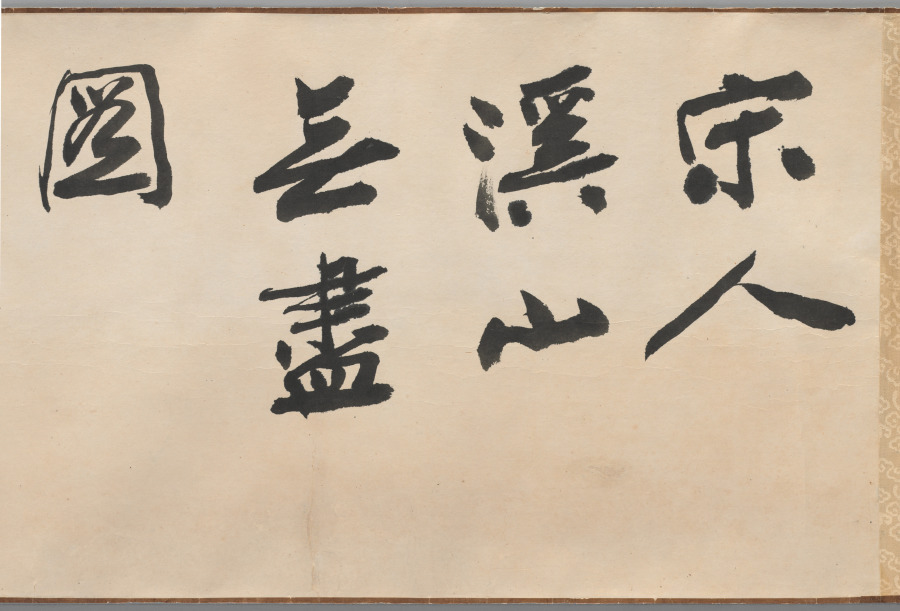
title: Streams and Mountains without End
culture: China, late Northern Song dynasty (960-1127) - Jin dynasty (1115-1234)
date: 1100–1150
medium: handscroll; ink and slight color on silk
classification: Painting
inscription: 9 colophons and 48 seals: 1 colophon, dated 1205, of Wang Wenwei 王文蔚 (dates unknown); 1 colophon, dated 1205, of Li Hui 李惠 (dates unknown); 1 colophon of Weiluo Tian Xie 蔚羅田獬 (dates unknown); 1 colophon, dated 1214, of He Yan 何言 (dates unknown); 1 colophon, dated 1326, of Cao Yuanyong 曹元用 (d. 1329) 1 colophon, dated 1332, of Kangli Zishan 康里子山 (Naonao; 1295-1345); 1 colophon, dated 1336, of Liu Zai 劉載. (dates unknown); 1 colophon, dated 1380, and 4 seals of Yang Mao 楊懋 (1300-after 1380); 4 seals of the Hou family (ca. 1340); 1 colophon of Wang Duo 王鐸 (1592-1652); 4 seals of Zhang Bingqian 張秉乾 (juren of 1729); 8 seals of Liang Qingbiao 梁清標 (1620-1691); 2 seals of the Qianlong emperor (r. 1736-95); 4 seals of the Jiaqing emperor (r. 1796-1820); 3 seals of the Xuantong emperor (r. 1909-11); 2 seals of Ye Gongchuo 葉恭綽 (1881-1968); 17 seals of Zhang Yuan 張爰 (Zhang Daqian 張大千, 1899-1983).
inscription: Colophon 1. Wang Wenwei 王文蔚. Dated third month and third day, 1205, under the reign of Zhangzong of the Jin dynasty. 造物元無心，山川秀氣聚。畫手亦無盡，各出新意度。 誰將妙林泉，淡墨寫縑素。重巒疊嶂間，三兩人家住。 茅舍隔素籬，小橋通細路。溪上數葉舟，雅有物外趣。 嵓崦藏招提，依稀認窗戶。山色四時宜，雲煙自朝暮。 不知塵世中，此景在何處。收拾買山錢，投老好歸去。 泰和乙丑三月三日平原王文蔚謹再拜，書于河東縣署之野趣堂。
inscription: Colophon 2. Li Hui 李惠. The colophon was written three days before the Qingming Festival in 1205. 畫師慣在山中居，含毫吮墨聊自娛。 閑將一段冰霜絹，寫出千里江山圖。 前山後山互出沒，山腰林樾相縈紆。 危橋澗溜瀉鳴玉，山根一匯為平湖。 波平短艇快漁釣，雲深細徑來樵蘇。 僊宮梵宇占幽勝，雕欄複閣森蓬壺。 往來行客煙靄外，飄飄野店青帘孤。 人家雞犬聲相接，熙熙化日安唐宇。 嗟余嗜好何其迂，膏肓泉石真吾徒。 一行作吏墮世網，薄書汨沒勞奔趨。 千巖萬壑但夢想，故園三徑應將蕪。 披圖暫洗黃塵眼，拊膺三嘆空踟躕。 泰和乙丑清明前三日絳臺李惠書于舜城府署之九思堂。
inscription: Colophon 3. Weiluo Tian Xie 蔚羅田獬. 畫工紛紛不可紀，擺脫俗流幾人耳。 夫誰援筆掃鵝溪，一段風煙且千里。 白波青嶂渺無窮，水接山兮山插水。 小橋野店相勾連，古寺樓臺突兀起。 飄然氣象與神俱，但患未明孰姓氏。 郭熙雖老典型存，為問主公無乃是。 此畫世希當寶藏，無與碌碌同一視。 更看卷首數公詩，奇絕清新相表裏。 蔚羅田獬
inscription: Colophon 4. He Yan 何言. Written in 1214. 萬有來自無，一真歸所託。畫師得三昧，胸中幻丘壑。 百態逐墨破，群形隨筆落。地近迹分明，天遙痕隱約。 雲物自吐吞，峯巒非斧鑿。江鄉閴無市，谷關常不鑰。 中有野夫閑，童琴而歩鶴。酒斾出籬懸，漁舟臨岸泊。 澗樹蔽橋樑，巖松迷殿閣。岑疊宿霧重，野曠林煙薄。 危棧接縈紆，亂泉通脈絡。途中人往來，僕馬何羸弱。 怪石虎踡跼，古木龍蟠錯。一幅宜好收，千金非易博。 玉堂閑卷舒，眼界增寥廓。視險尚寛平，見危除慘虐。 氣象溢國華，川澤資廟略。功名業已書，歸去鞭先著。 但知色即空，何是今非昨。飽乎仁智心，箇中無限樂。 貞祐甲戌秋暮，東營何言題。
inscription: Colophon 5. Cao Yuanyong 曹元用 (d. 1329). Dated 1326. 岸擁危橋斷，溪浮小艇斜。 萬山最深處，依約兩三家。 泰定丙寅秋，曹元用題。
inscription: Colophon 6. Kangli Zishan 康里子山 (i.e., Kangli Naonao). The colophon bears a date of 1332. 右溪山圖，意韻蕭灑。一見使人有烟霞之想，真可珍藏。又有□金諸名勝題詩其左。兵火之餘， 殊不易得也。 至順三年暮春之月，康里子山跋。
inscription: Colophon 7. Liu Zai 劉載. 雲拂埜田閑種玉，雨餘巖溜碎傾金。 幾時也結團茆去，麟閤恬然不挂心。 至元二年正月，長安劉載載之謹錄上。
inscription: Colophon 8. Yang Mao 楊懋 (1300–after 1380). 觀此圖，經營位置，筆法高古，山明石潤。其橋梁、路道、樹林、人物、遠近；一一誠得真山水之深趣。非當時名筆有大才者不能至此。不必問其誰何，可為神品。况宋金元三朝名公所跋，尚不能記，想其來尤遠矣。然而物經累變而尚存，是物之有壽者也。余不復再論。文顯其保之。洪武庚申春，八十翁楊懋觀。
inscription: Colophon 9. Wang Duo 王鐸 (1592–1652). 文蓀親翁博雅，文詩鴻暢。舍弟持此喜觀，遂抽管題數語： 山勢委折，筆墨無痕。宋人中如此不多見也。譬之兵家，當是韓白。王鐸。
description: Streams and Mountains without End was a landmark acquisition of 1953, made just a year after Sherman Lee had returned to Cleveland as curator of Oriental art. He acquired it with the intention to provide "a more than adequate foundation for a fine collection of Chinese landscape painting." This impressive work demonstrates the culmination of stylistic developments in Chinese monumental landscape painting following the Northern Song tradition. It represents a journey through a landscape, making it a fitting metaphor for Lee’s journey of discovery and achievement over a lifetime.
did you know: The portrayal of the distant lands is rich with details like pavilions, villages, and human activities.